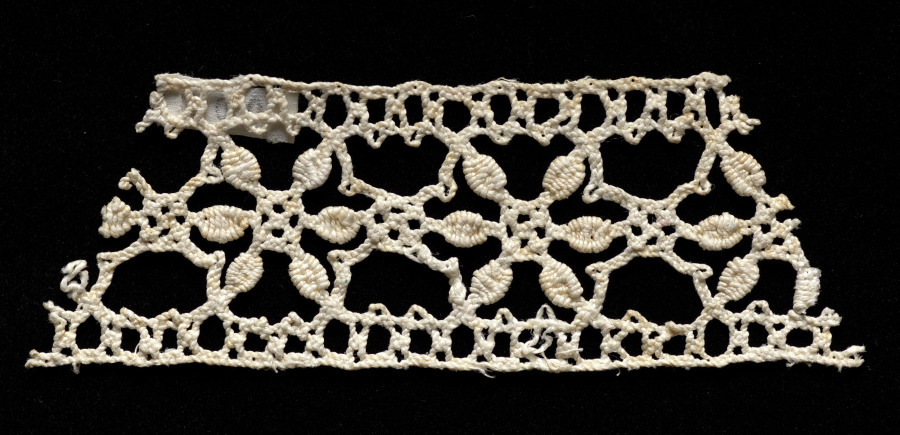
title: Lace Insertion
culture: Italy, Genoa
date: 1600s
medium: Bobbin lace (needle lace, reticella design)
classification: Lace